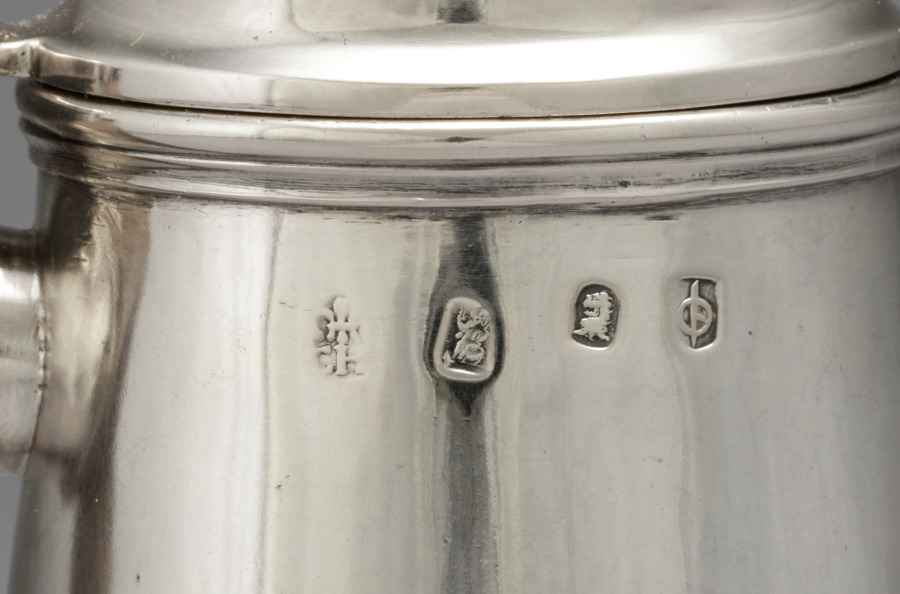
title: Coffee Pot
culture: England, London, 18th century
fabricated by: John Chartier (British)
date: 1702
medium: silver, wooden handle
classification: Silver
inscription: scratched on base: "21=16"; "21=12." Coat of arms engraved in contemporary mantling: oak tree with four lower branches beginning to sprout. (Arms of "Here" family.)